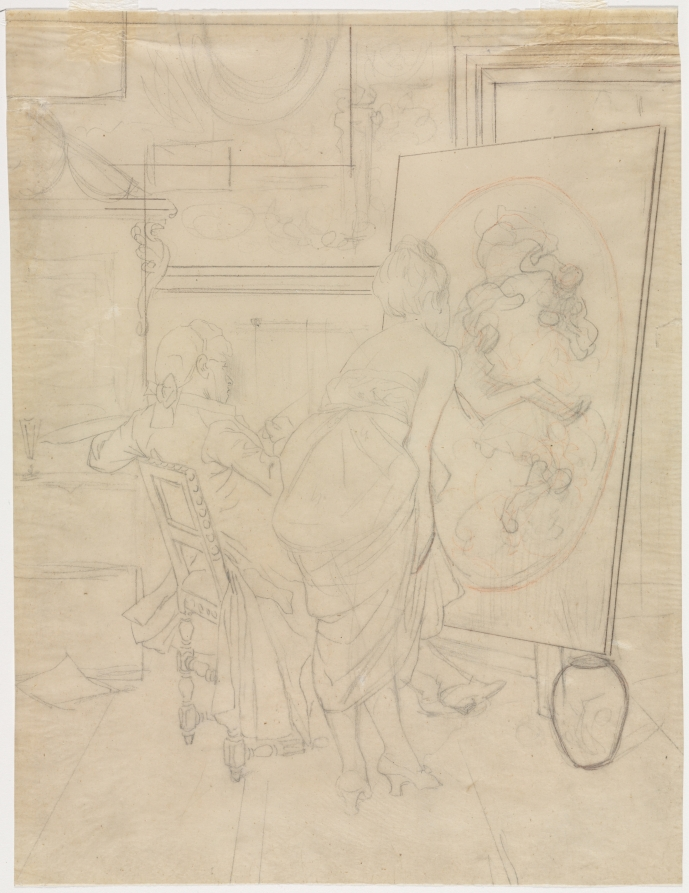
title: Cartoon for The Opinion of the Model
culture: France, 19th century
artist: Charles Bargue (French, 1826–1883)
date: c. 1840s-1883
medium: graphite with red colored pencil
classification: Drawing